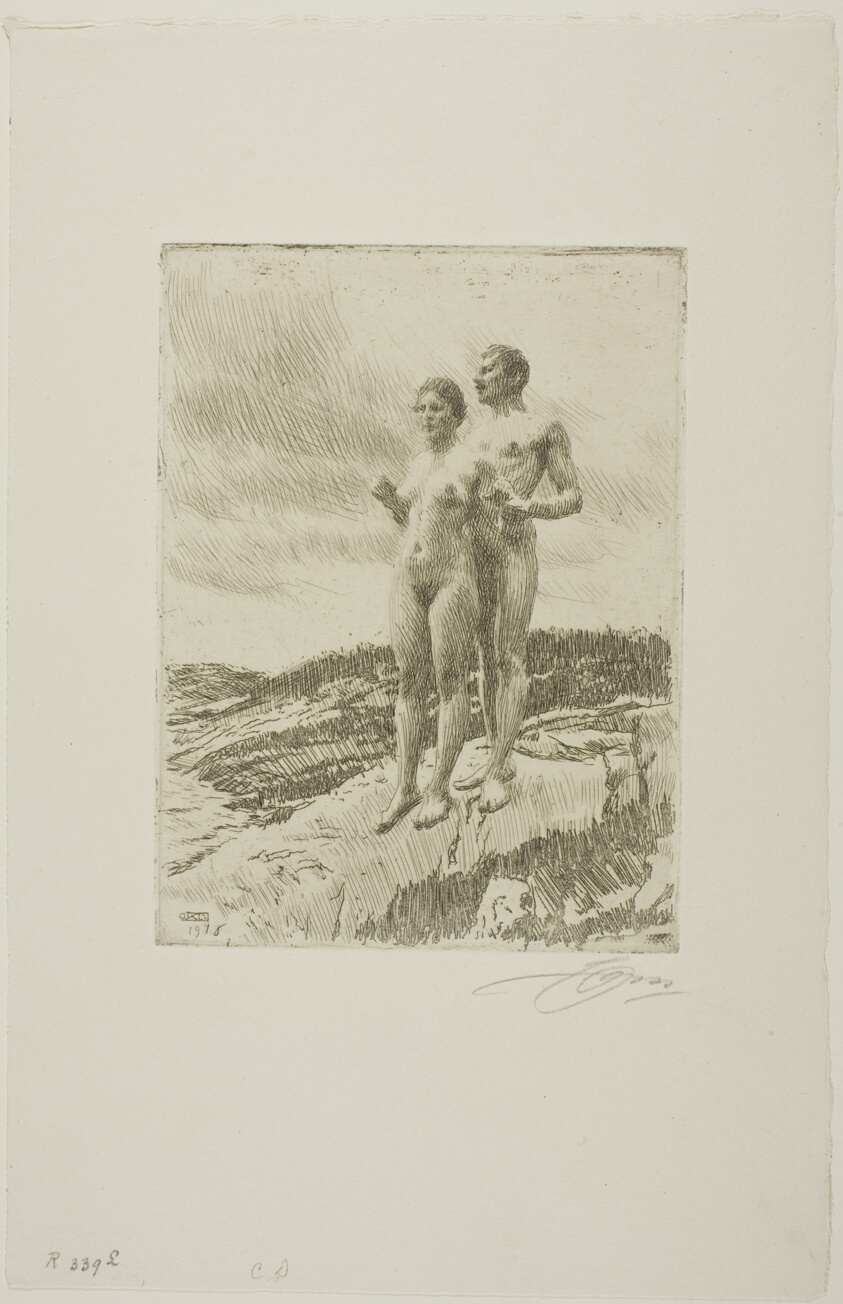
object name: Print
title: The Two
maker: Anders Zorn (Swedish, 1860-1920)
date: 1916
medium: Etching on ivory laid paper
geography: Sweden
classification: etching; print; prints and drawing